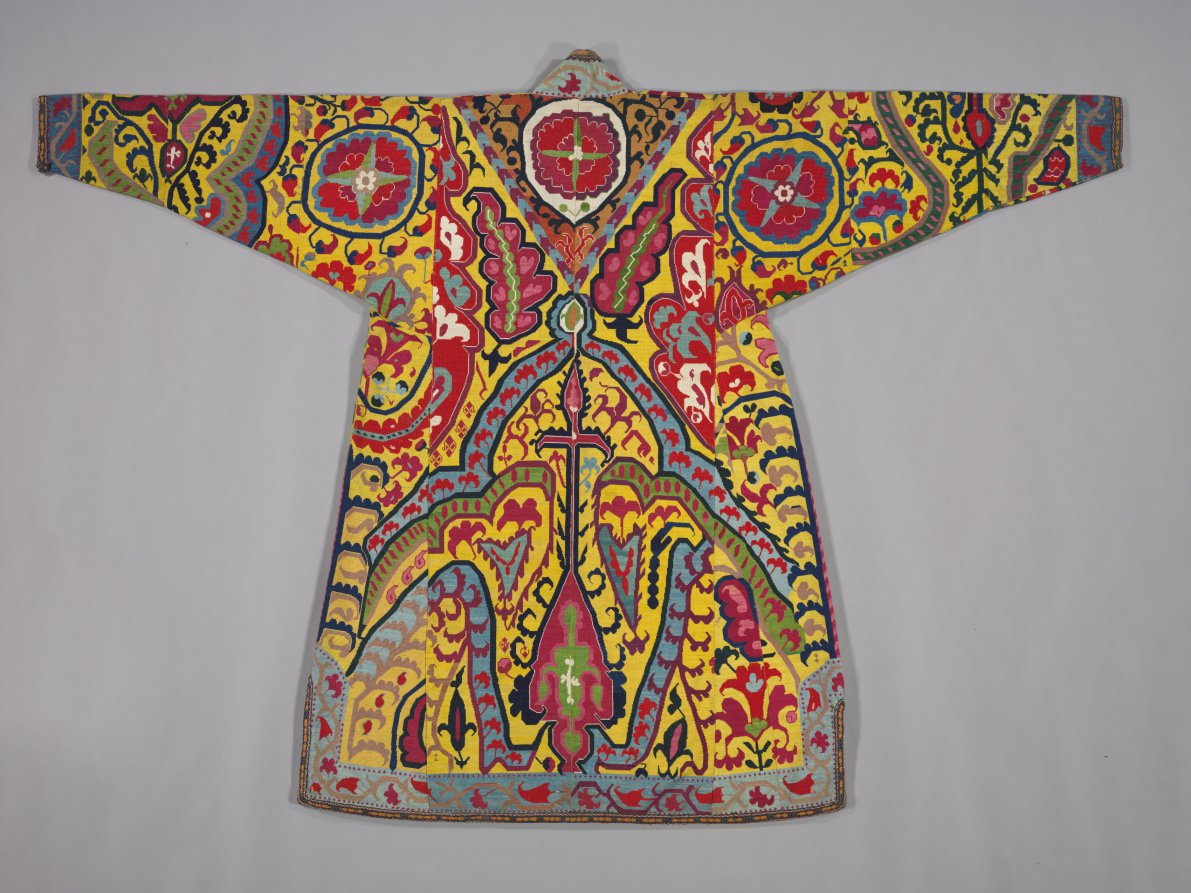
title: Man's surcoat (khalat)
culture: Uzbekistan, Shahr-i Sabz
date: late 1800s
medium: Silk: embroidery, cross-stitch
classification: Garment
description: Prestigious men’s surcoats embellished with designs such as this dramatic decoration in cross-stitch were among the most elaborate silk-thread embroidered garments in Central Asia. In a flamboyant style, large palmettes framed by split palmette leaves dominate with quartered rosettes and smaller flora on a brilliant yellow ground. Foliate vines enhance the edge along the front center opening, hemline, and cuffs. It is lined with an ikat of cypress trees and finger-looped trim. The style and technique represent professional work from Shahr-i Sabz, south of Samarkand. The pattern was drawn on the cotton ground cloth of the surcoat, then disassembled for stitching, and finally reassembled—revealed by severed and misaligned motifs plus mismatched colors.